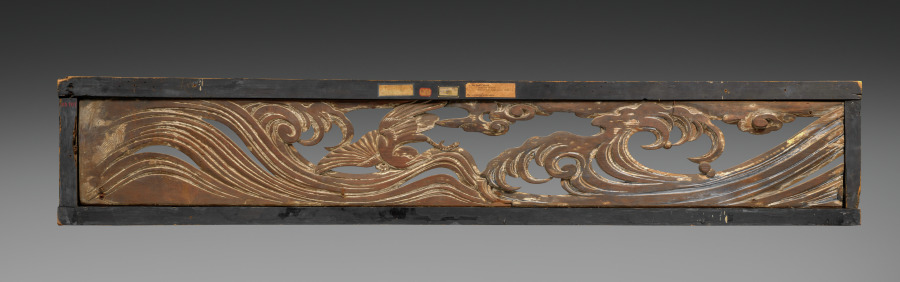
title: Chidori and Waves (ramma)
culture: Japan, Edo period (1615–1868)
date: c. 1700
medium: wood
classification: Wood